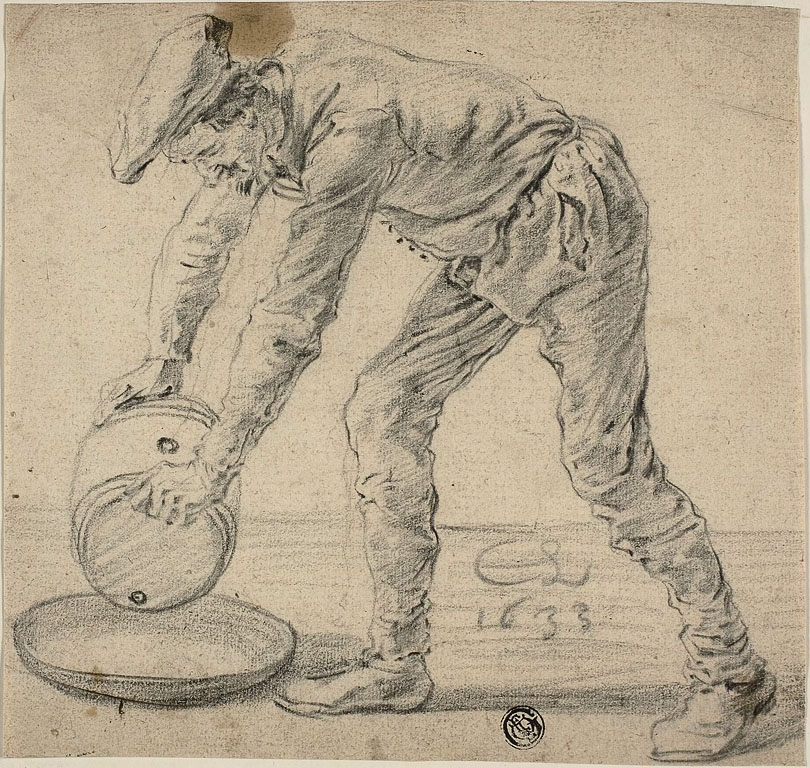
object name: Drawing and Watercolor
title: Man with a Keg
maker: Cornelis Saftleven (Dutch, 1607-1681)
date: 1633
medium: Black chalk on buff laid paper, tipped onto ivory wove paper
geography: Holland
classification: chalk; drawings (visual works); prints and drawing